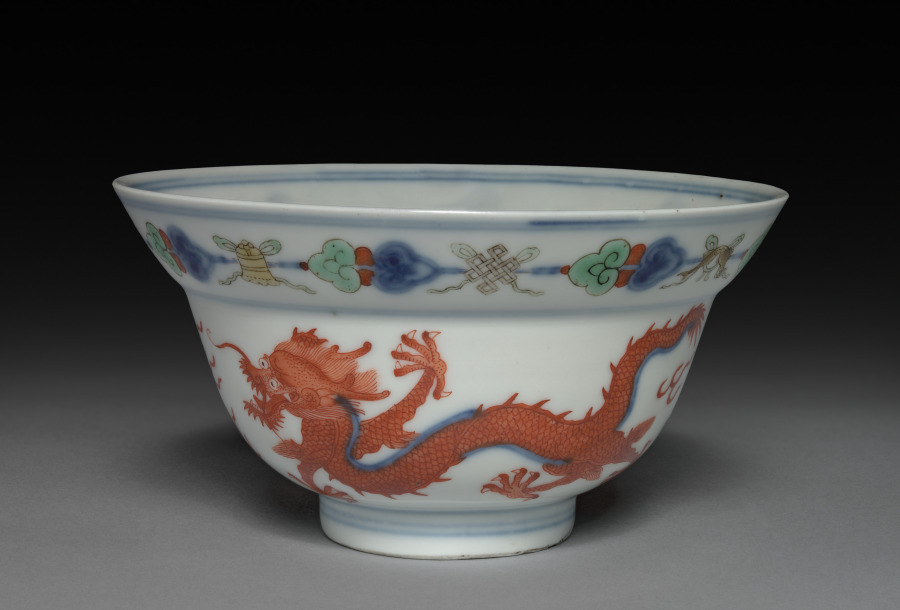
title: Bowl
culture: China, Jiangxi province, Jingdezhen kilns, Qing dynasty (1644-1911), Yongzheng mark and reign (1722-35)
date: 1723–35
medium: porcelain with doucai decoration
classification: Ceramic